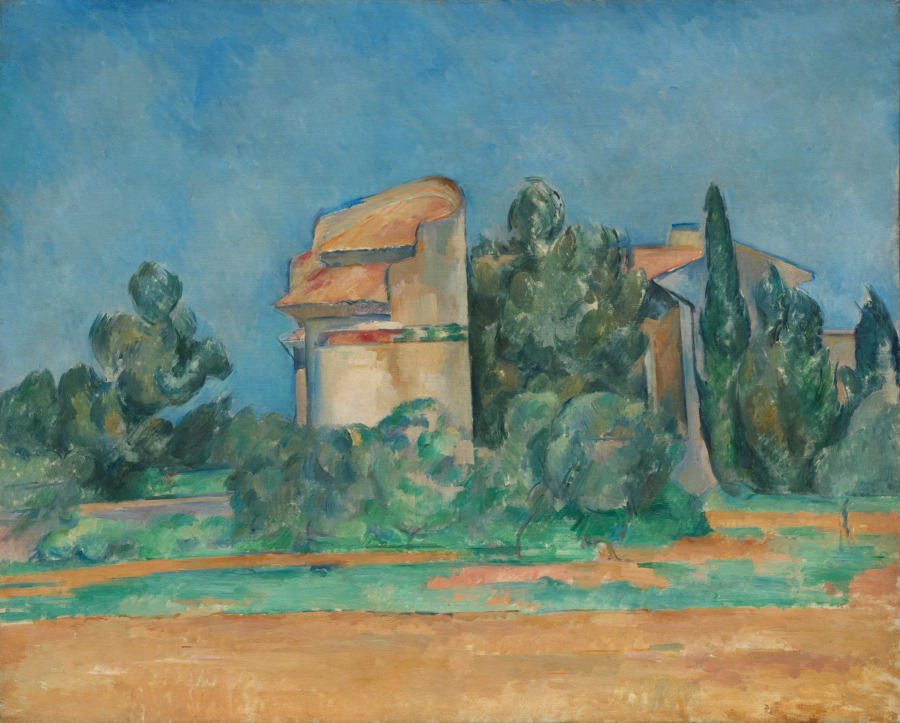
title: The Pigeon Tower at Bellevue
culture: France, 19th century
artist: Paul Cezanne (French, 1839–1906)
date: 1890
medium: oil on fabric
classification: Painting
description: Paul Cezanne painted this composition in three horizontal planes: the azure blue of the sky; the luminous white of the tower and the farmyard buildings; and the burnt-orange shade of the foreground earth, whose color is indicative of the iron-rich soil of Provence. The shimmering greens of Cezanne’s favorite cypress and olive trees are interspersed across the middle ground. The composition is pared down to its essentials, devoid of extraneous detail; it exemplifies his ambition “to make something solid and enduring, like the art in museums.”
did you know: Cézanne’s method of compressing space and simplifying forms into flattened, geometric shapes provided the foundation for both Fauvism and Cubism.